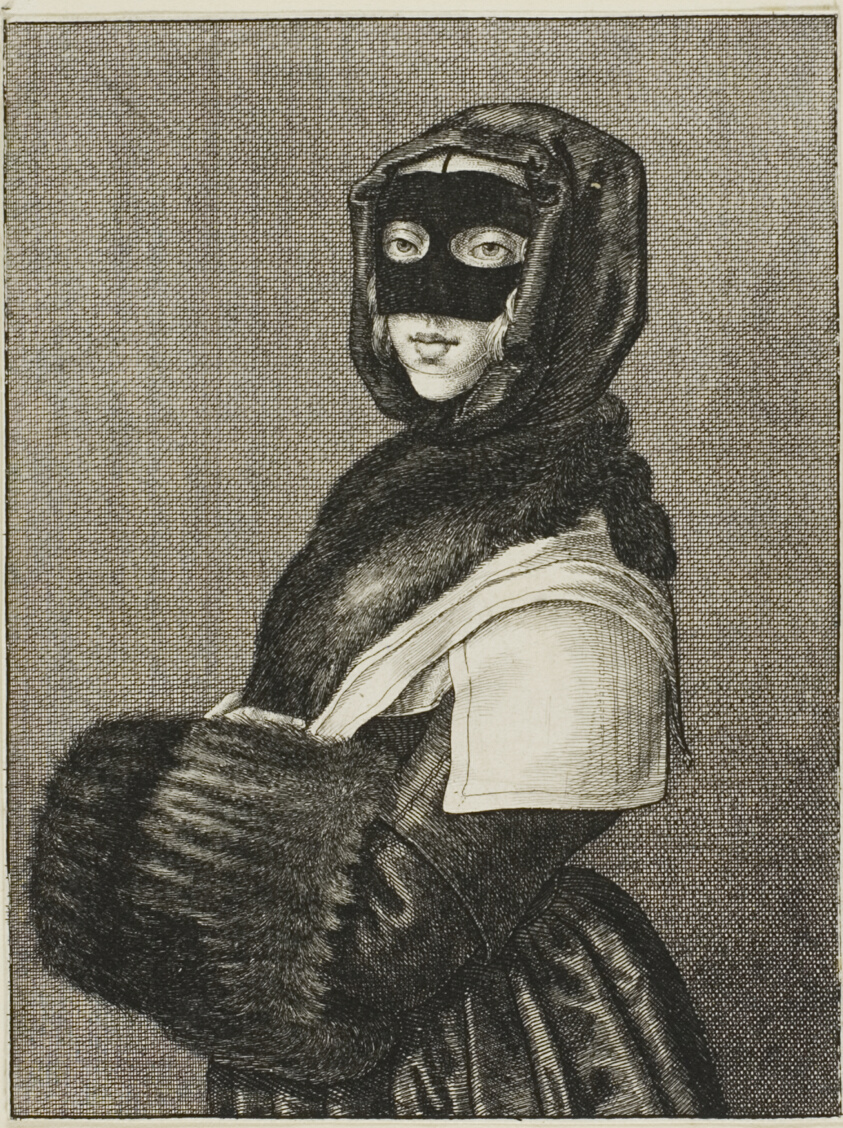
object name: Print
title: Winter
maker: Wenceslaus Hollar (Bohemian, 1607-1677)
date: 1644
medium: Etching on ivory laid paper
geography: Bohemia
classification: etching; prints and drawing; paper; print